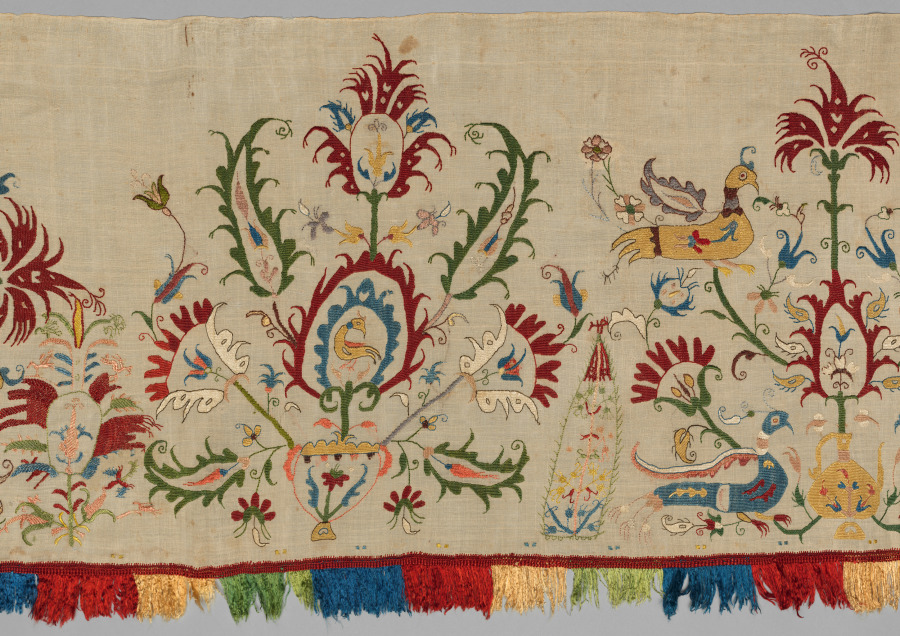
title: Side Panel of a Bedspread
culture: Greece, Sporades Islands, Skyros, 18th century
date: 1700s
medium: embroidery: silk on linen tabby ground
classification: Embroidery